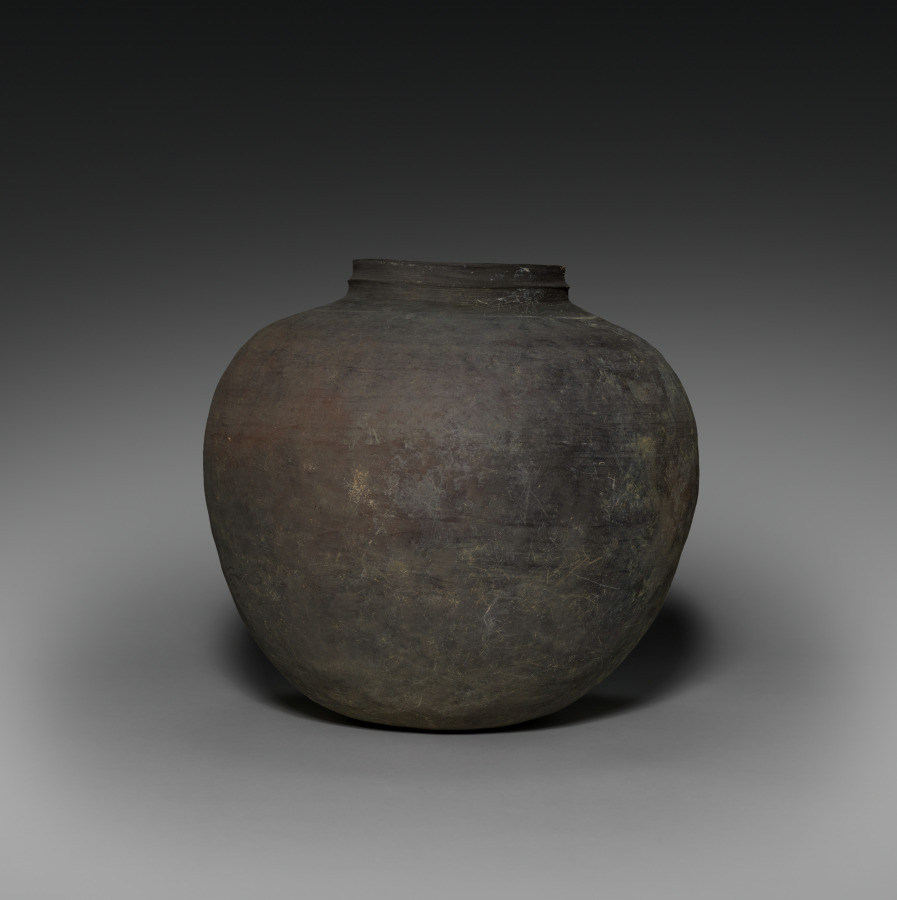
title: Vessel with Knobbed Lid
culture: Korea, Gaya period (42–562 CE)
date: 200s–300s CE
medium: stoneware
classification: Ceramic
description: This storage vessel is distinguished by its robust, subtly proportioned form and its body color. The purplish-brown surface "skin" is enlivened by a series of smoky black swirling marks that occurred during the firing in the wood kiln. This shape began as a series of clay coils that were pinched and then paddled; however, it spent more time on a potter's wheel to thin and finish its outer surface. The lid received similar, understated attention to detailing and finish.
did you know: This type of lidded vessel served to contain cremated remains, indicating the popularity of Buddhist mortuary practice in Korea during the Three Kingdoms period.